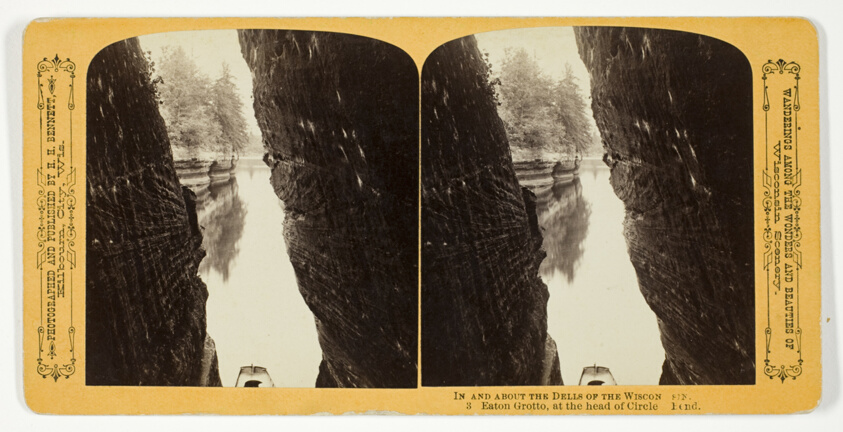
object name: Photograph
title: Eaton Grotto, at the head of Circle Bend, No. 3 from the series "In and About the Dells of the Wisconsin River"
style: 19th century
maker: Henry Hamilton Bennett (American, born Canada, 1843-1908)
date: 1870/1908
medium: Albumen print, stereo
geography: Wisconsin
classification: photography; photograph; albumen silver print; stereograph (albumen)